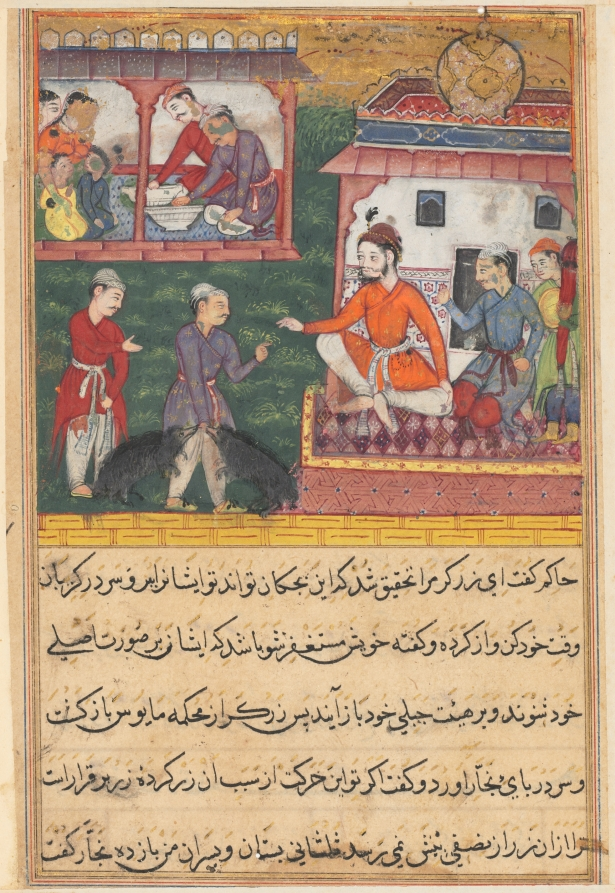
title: The goldsmith judged; the bear cubs trained by the carpenter as though they were his sons, from a Tuti-nama (Tales of a Parrot): Third Night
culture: Mughal India, court of Akbar (reigned 1556–1605)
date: c. 1560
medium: gum tempera, ink, and gold on paper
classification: Painting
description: In the upper-left corner, the goldsmith and the carpenter have dinner with their wives and children. The greedy goldsmith has robbed the carpenter who, in revenge, abducts the goldsmith’s sons and replaces them with two bear cubs. Below, the bears rub their faces against the goldsmith’s sleeves, proving to the judge that they must be the man’s transformed children.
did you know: After the goldsmith returned the stolen goods, his sons were given back.